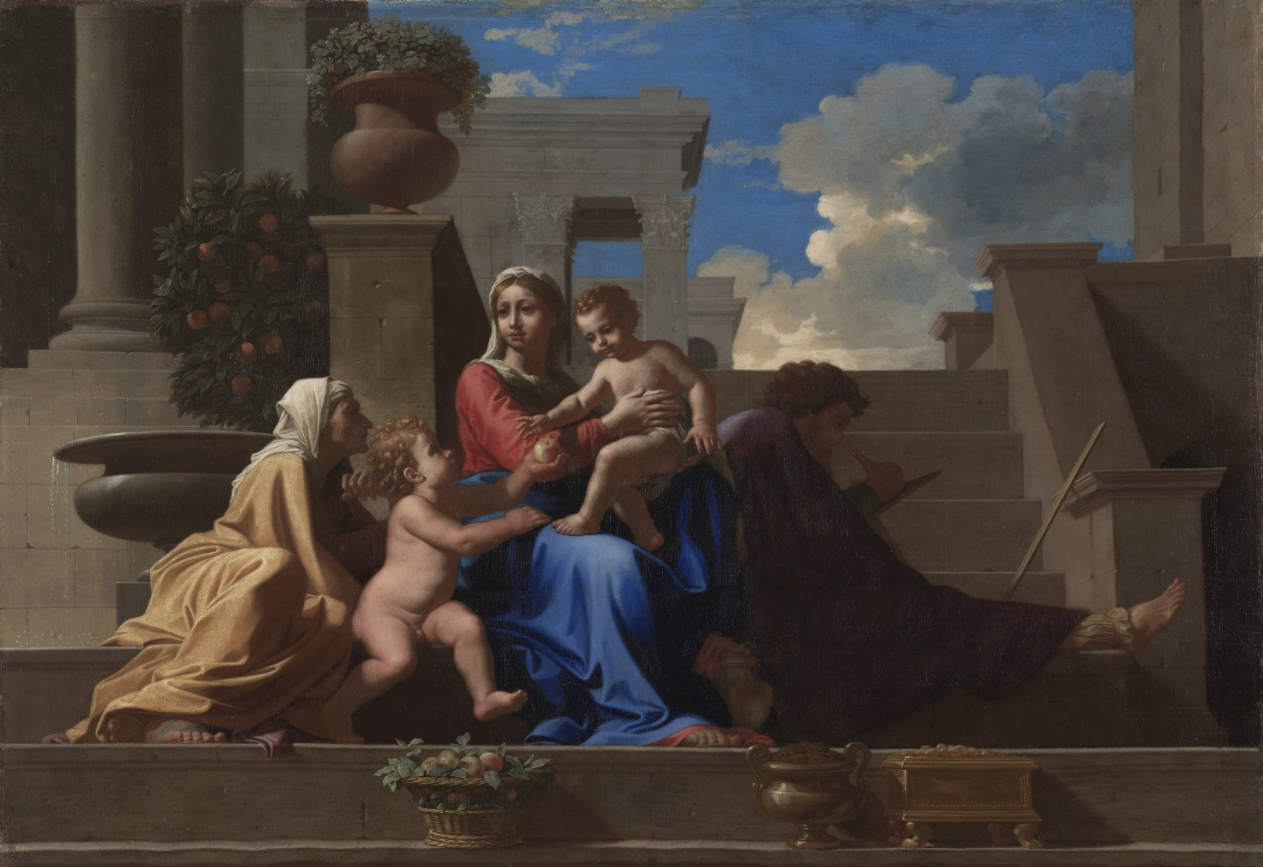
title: The Holy Family on the Steps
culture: France, 17th century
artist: Nicolas Poussin (French, 1594–1665)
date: 1648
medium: oil on canvas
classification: Painting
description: This deceptively simple composition represents a complex meditation on the Holy Family’s role in the redemption of humanity. At the center, Mary presents the Christ child to the world. At the left, Saint Elizabeth leans forward to foretell his eventual death, while her son, Saint John the Baptist, offers Jesus an apple, signifying humanity’s fall from grace in the Garden of Eden. At the right, Saint Joseph holds a compass, a sign of his occupation as a carpenter and also symbolic of God the Father. Poussin developed his composition meticulously and deliberately, using clear primary colors, simple forms, and a geometric organization to express the central importance of the Holy Family in Christian belief.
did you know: Poussin placed small wax models in a box pierced with holes to study lighting effects.